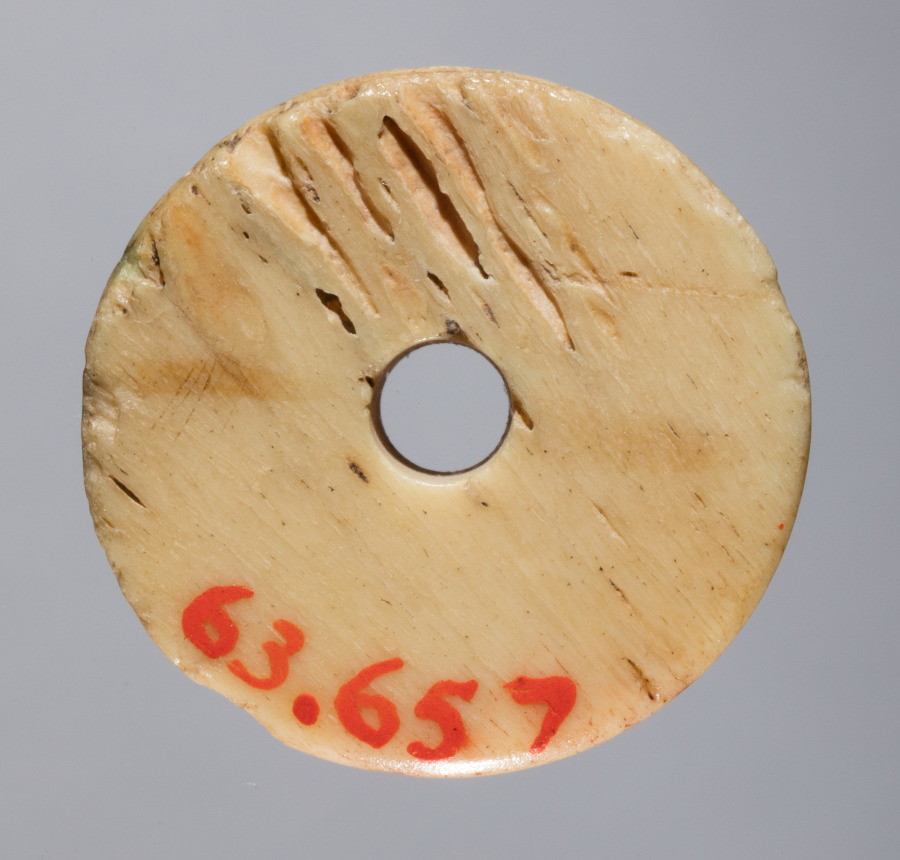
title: Spindle Whorl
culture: Iran, early Islamic period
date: 700s - 900s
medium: bone, incised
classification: Spindle Whorl